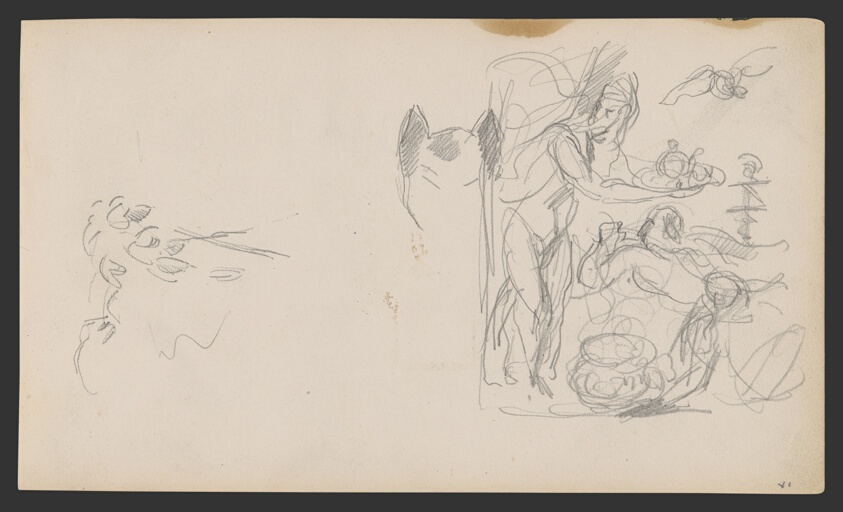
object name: Drawing and Watercolor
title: Sketchbook No. 2 (L'Estaque)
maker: Paul Cézanne; French, 1839-1906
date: 1875–86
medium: Graphite and pen and ink drawings on paper, bound into a book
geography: France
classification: sketchbook; graphite; prints and drawing; paper